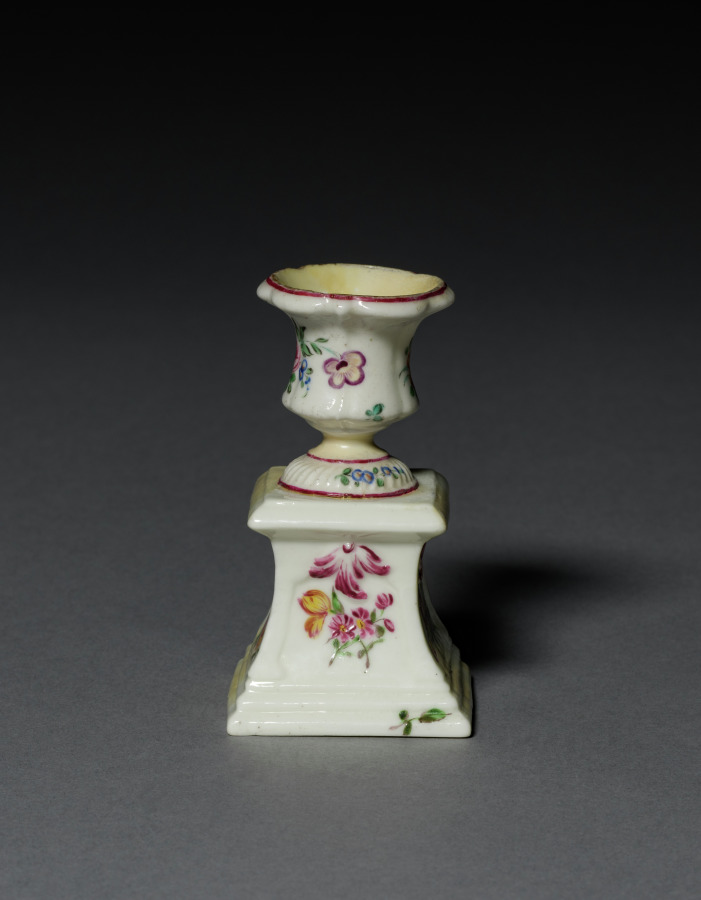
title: Medici Vase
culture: France, Mennecy, 18th century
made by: Mennecy Factory (French)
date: c. 1760–1765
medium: soft-paste porcelain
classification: Ceramic